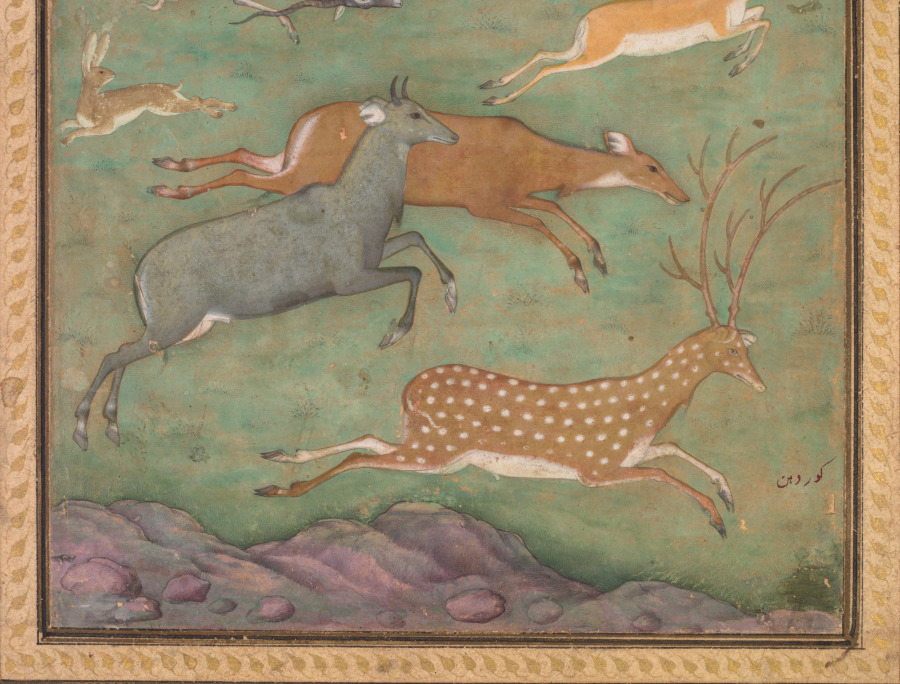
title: Antelope and deer hunt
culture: Mughal India, Allahabad, made for Prince Salim (1569–1627)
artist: Govardhan (Indian, active c.1596–1645)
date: c. 1602–4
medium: Gum tempera and gold on paper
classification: Painting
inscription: recto, lower right: Govardhan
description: The Mughals used trained cheetahs, such as this one wearing a red collar, to capture prey during hunting expeditions in the wilderness. The metaphor of the hunt was also a potent image in Persian literature, in which the protagonist finally achieves a desired goal. The central image of the cheetah catching the black buck—a frequently repeated visual trope—resonates with the desire of Prince Salim (who was passionate about hunting) to capture the throne of the Mughal Empire from Akbar, his father. Between 1600 and 1605, when Prince Salim set up his own royal court in defiance of his father, he convinced some imperial artists to join him. The young Govardhan, a Hindu who would go on to achieve high stature in the atelier of the next two emperors, was one of them.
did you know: The gray antelope in the foreground is called a nilgai and is the largest antelope in Asia.